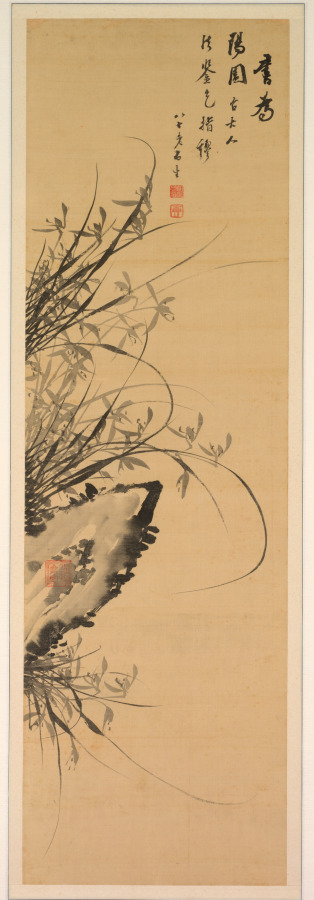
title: Orchids and Rocks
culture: Korea, Joseon dynasty (1392–1910)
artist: Yi Ha-eung (Korean, 1820–1898)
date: 1897–98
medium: Eight-panel folding screen; ink on silk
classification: Painting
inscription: Translation: [I] painted for the high minister Yangwon. [I] humbly request your corrections and advice [on my painting]. [By] an eighty-year old gentleman of rocks.)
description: Yi Ha-eung (1820−1898), the artist of this eight-panel folding screen, was one of the most influential men in late 19th-century Korea. Acting as the regent for his son, King Gojong (1852−1919), who ascended the throne at the age of thirteen, Yi ruled Korea from 1866 to 1873. In addition to his illustrious political career, Yi was also recognized as one of the most celebrated artists who led the revival of literati art in late 19th-century Korean art. In particular, he was recognized as the master of orchids, one of the “Four Gentlemen” (plum, orchid, chrysanthemum, and bamboo) themes. Solely relying on monochrome ink, Yi depicted the curvilinear silhouettes of cymbidium orchid leaves dramatically hanging down from cliffs. Growing in wilderness and redolent with fragrance, orchids were often associated with the perseverance of principled gentlemen, and thus became one of the most popular subjects of scholar-artists' paintings.On the upper right corner of the far left panel, Yi wrote a short inscription stating that he painted the work at the age of 80.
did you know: The artist of this elegant painting is the formidable politician Yi Ha-eung (1820–1898), who is known for a seclusion policy that aimed to protect Korea and its sovereignty from foreign influences.